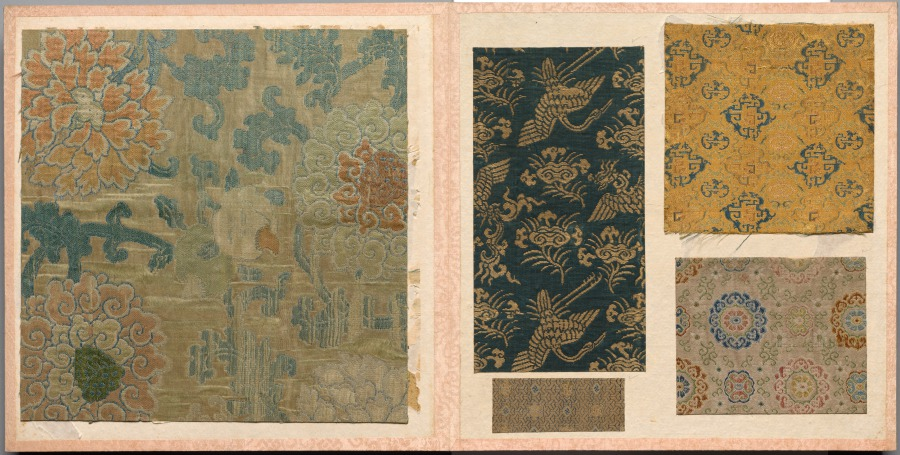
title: Album of Textile Samples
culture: Japan and China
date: 1700s–1800s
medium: silk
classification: Textile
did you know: This album contains 46 pages with 156 mounted Chinese or Japanese textile samples.